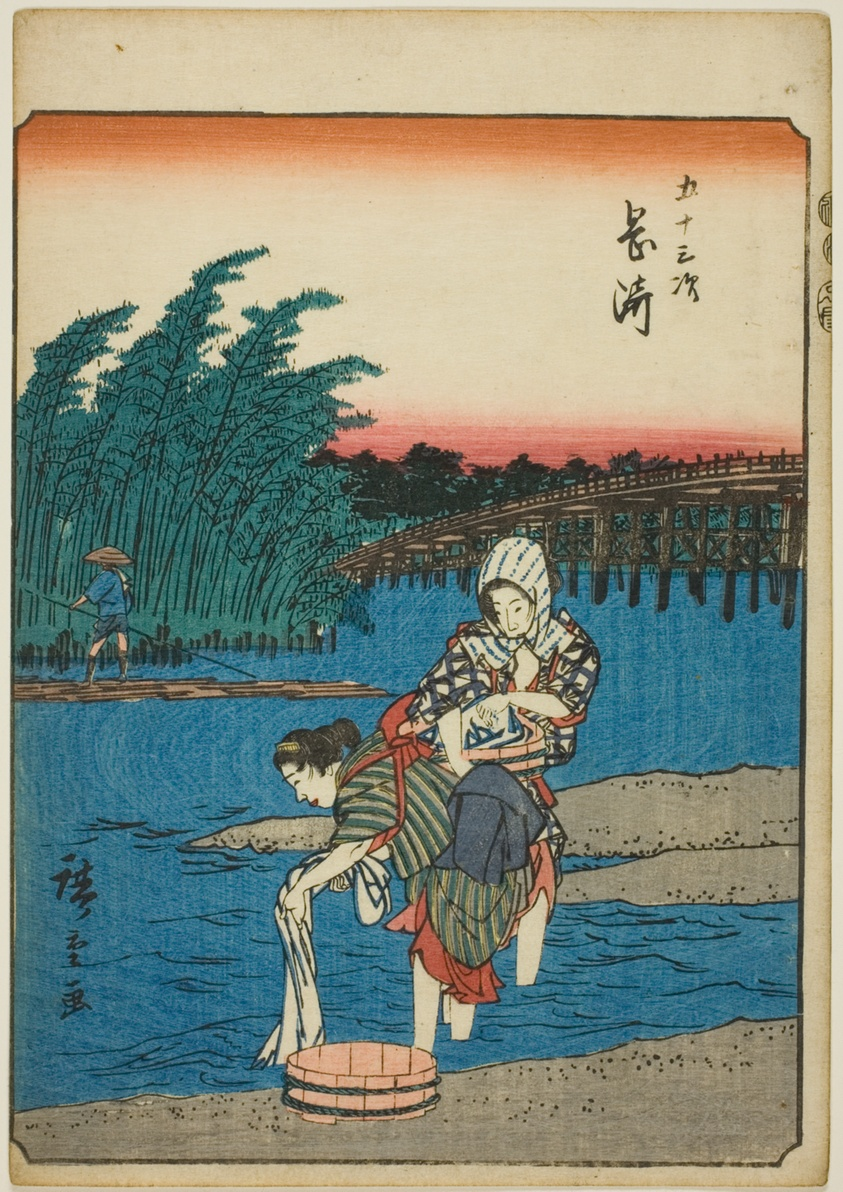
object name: Print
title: Okazaki, from the series "Fifty-three Stations [of the Tokaido] (Gojusan tsugi)," also known as the Figure Tokaido (Jinbutsu Tokaido)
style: Japanese (culture or style)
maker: Utagawa Hiroshige 歌川 広重; Japanese, 1797-1858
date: 1852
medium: Color woodblock print; chuban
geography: Japan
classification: woodblock print; print